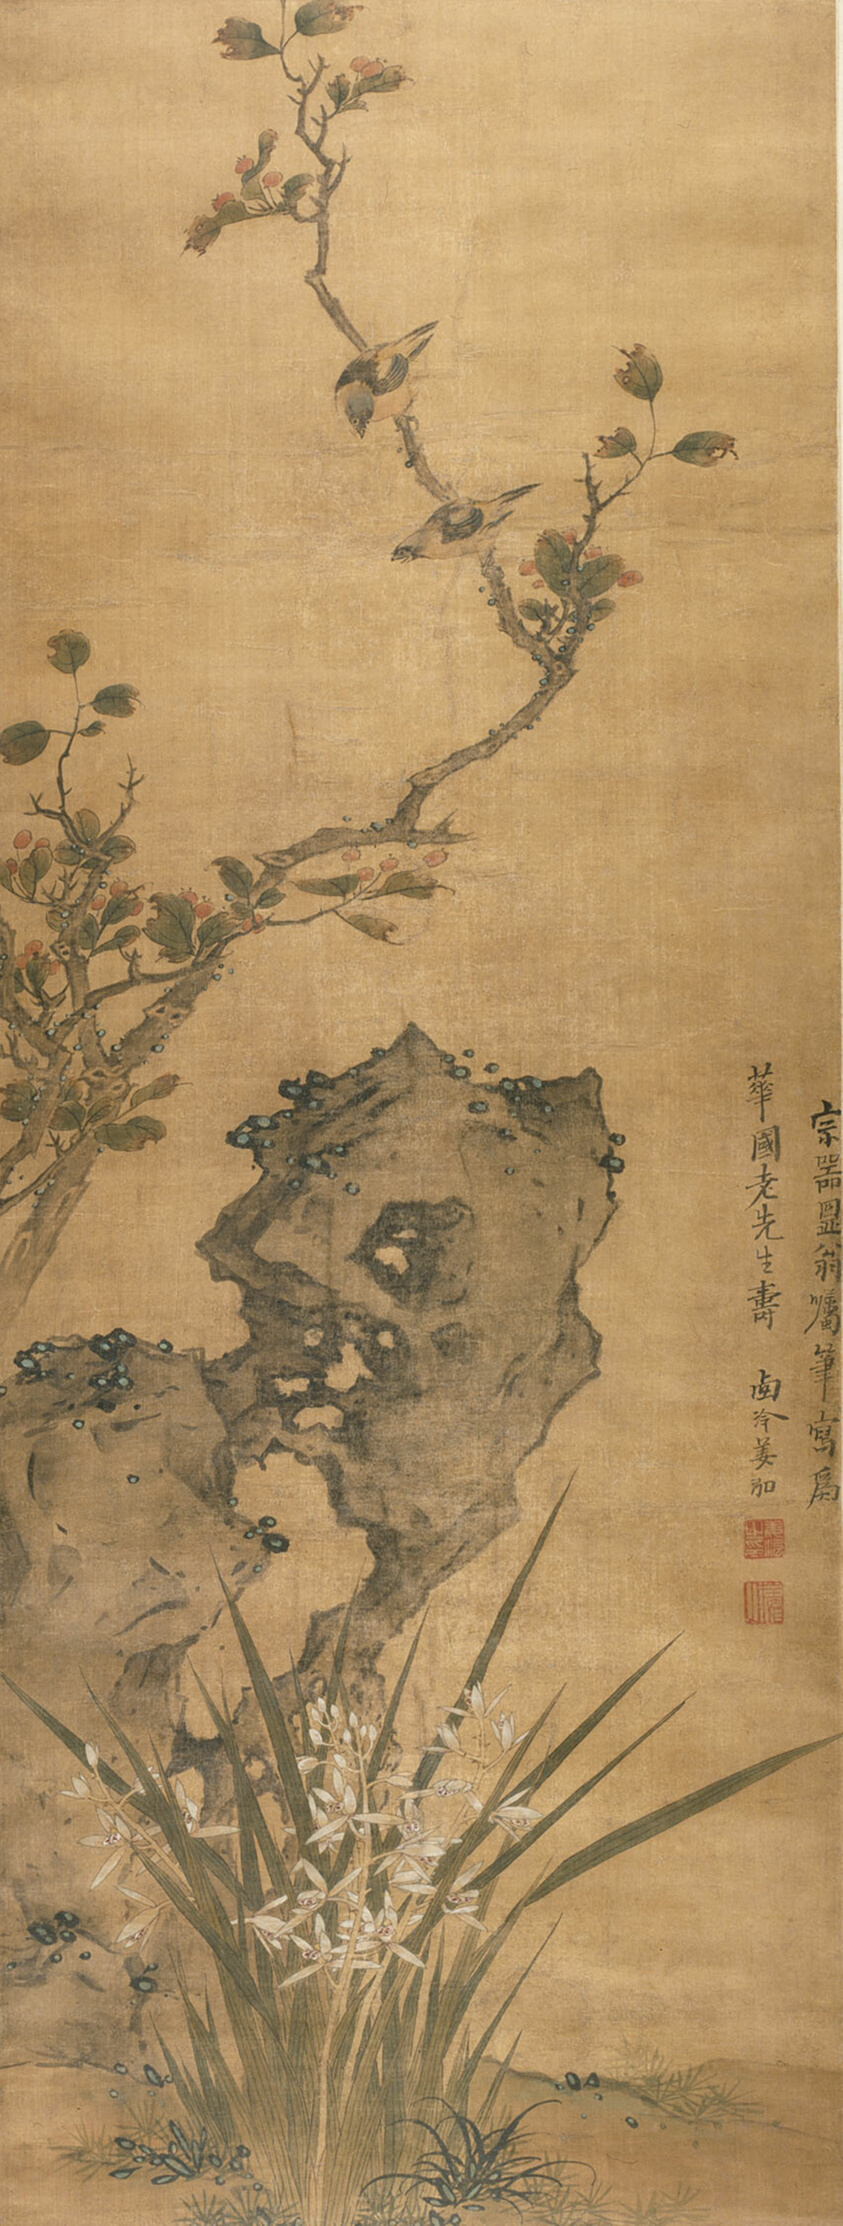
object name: Painting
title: Birds on a Tree with Fruit and Autumn Foliage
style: Chinese (culture or style)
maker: Jiang Hong 姜泓; Chinese, active 1674/90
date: Qing dynasty (1644–1911); late 17th century 清朝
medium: Hanging scroll, ink and colors on silk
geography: China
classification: hanging scroll; painting; asian art